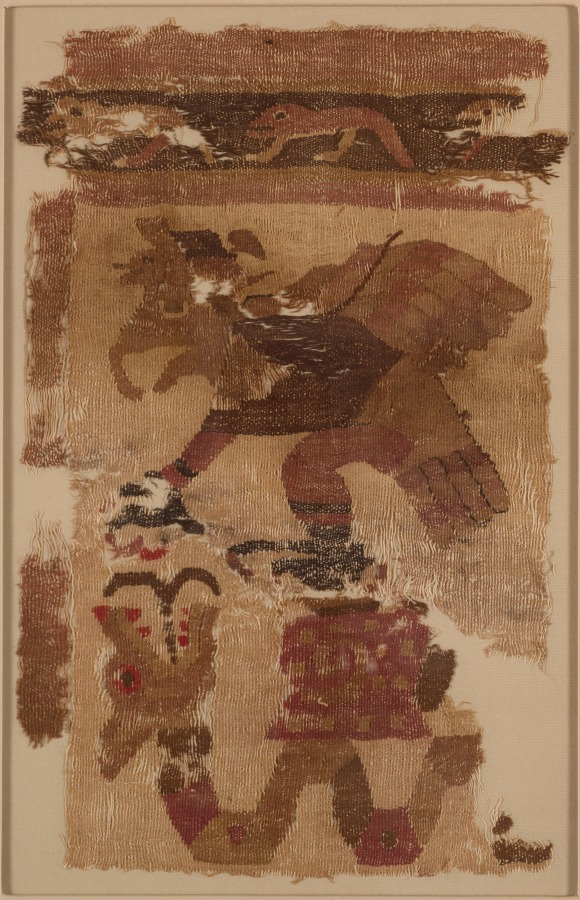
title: Textile Fragments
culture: Peru, Moche, north coast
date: c. 50–650 CE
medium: cotton and camelid fiber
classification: Textile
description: These fragments are rare survivors of catastrophic rains that destroyed much of the Moche textile legacy and may have helped to bring about the decline of Moche culture. Each depicts a serpent and a snail beneath a hovering raptorial bird—perhaps a snail kite, a type of hawk named after its favored food. The size of the motifs implies that the original textile was large; a mantle (a shawl-like garment) or a hanging are among the possibilities.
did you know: These fragments are rare survivors of floods that destroyed much of the Moche textile record.